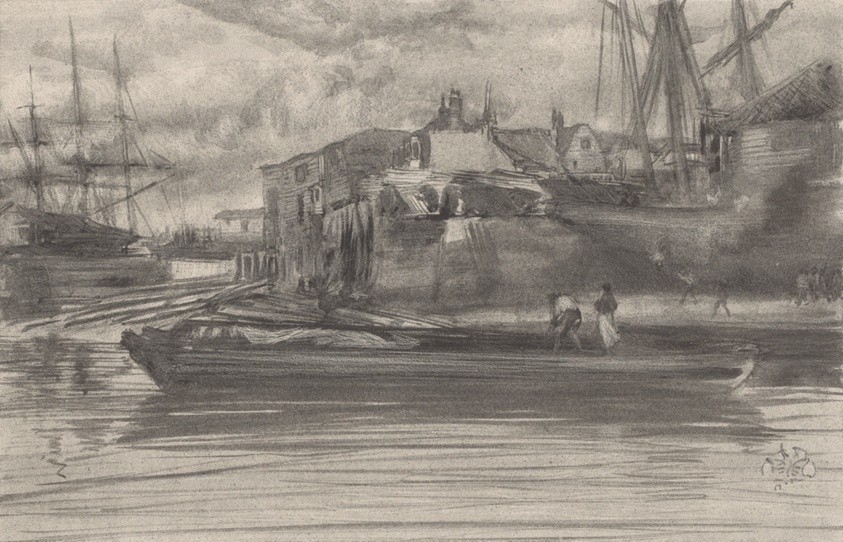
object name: Print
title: Limehouse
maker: James McNeill Whistler (American, 1834-1903)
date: 1878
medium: Lithotint, in black ink, with scraping and incising, on a prepared half-tint ground, on ivory plate paper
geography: United States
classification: lithotint; lithograph; print; prints and drawing; paper